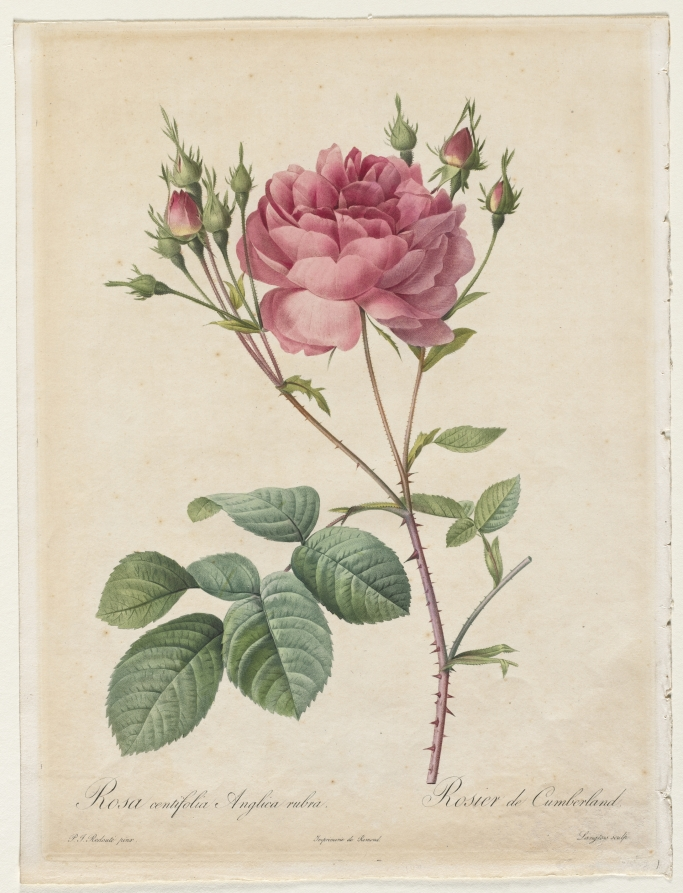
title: Rosa Centifolia Anglica Rubra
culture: France, 19th century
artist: Henri Joseph Redouté (French, 1766–1853)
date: 1817–1824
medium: stipple and line engraving, with hand coloring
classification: Print